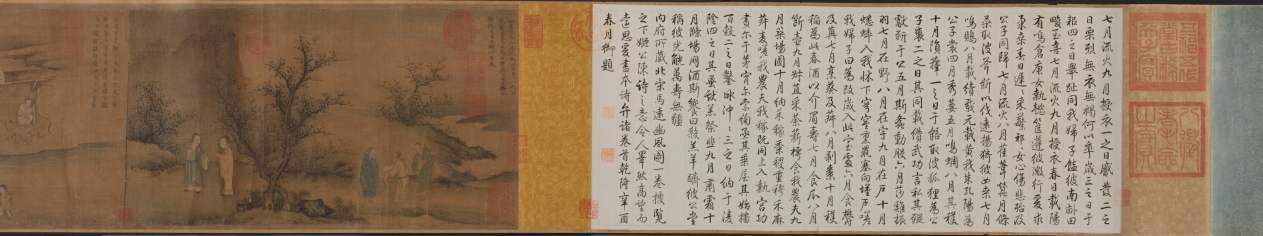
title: "Seventh Month" from the Odes of Bin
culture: China, Southern Song dynasty (1127-1279)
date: 1200s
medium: Handscroll; ink and color on silk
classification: Painting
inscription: Colophons: 1. [on the frontispiece] by the Qianlong emperor (dated 1741). 2. by Lu Wan (dated Zhengde dingchou, 1517). 2. by the Jiaqing emperor (dated 1807).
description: According to Confucian thought, the ruler looks after the well-being of his people which involves agricultural activities. Seventh Month from the ancient Odes of Bin in the Shijing (Book of Poetry) describes occupations throughout the year, including plowing, harvesting, hunting, making clothes, and observing rituals. The earliest illustrations of these Odes accompanied by text were commissioned by Southern Song emperor Gaozong (reigned 1127–1162). As the lower Yangzi delta had become the new seat of government, Gaozong had sets of these illustrations produced by court artists to revive the dynasty and convince the Confucian officialelite of his legitimacy to rule.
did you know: The Odes of Bin appears in the classic Shijing (Book of Poetry), an anthology of more than 300 poems, folk songs, and ceremonial hymns that were originally chanted to music.